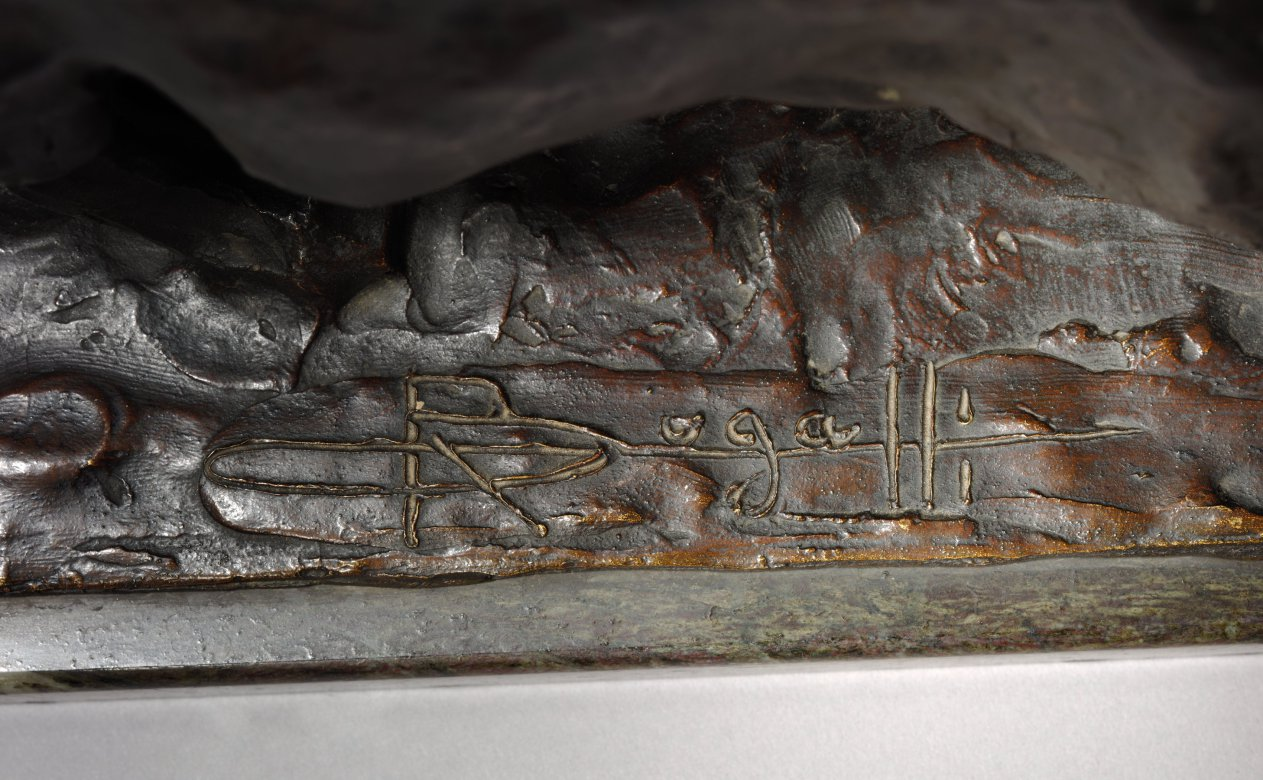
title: Walking Panther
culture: Italy, active in France, early 20th Century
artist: Rembrandt Bugatti (Italian, 1884–1916)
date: 1903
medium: bronze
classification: Sculpture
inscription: signed: R. Bugatti, stamped A. A. Hebrard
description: Panthers were among the first wild animals depicted by Rembrandt Bugatti after his encounter with them in the French national zoo, at the Jardin des Plantes in Paris.